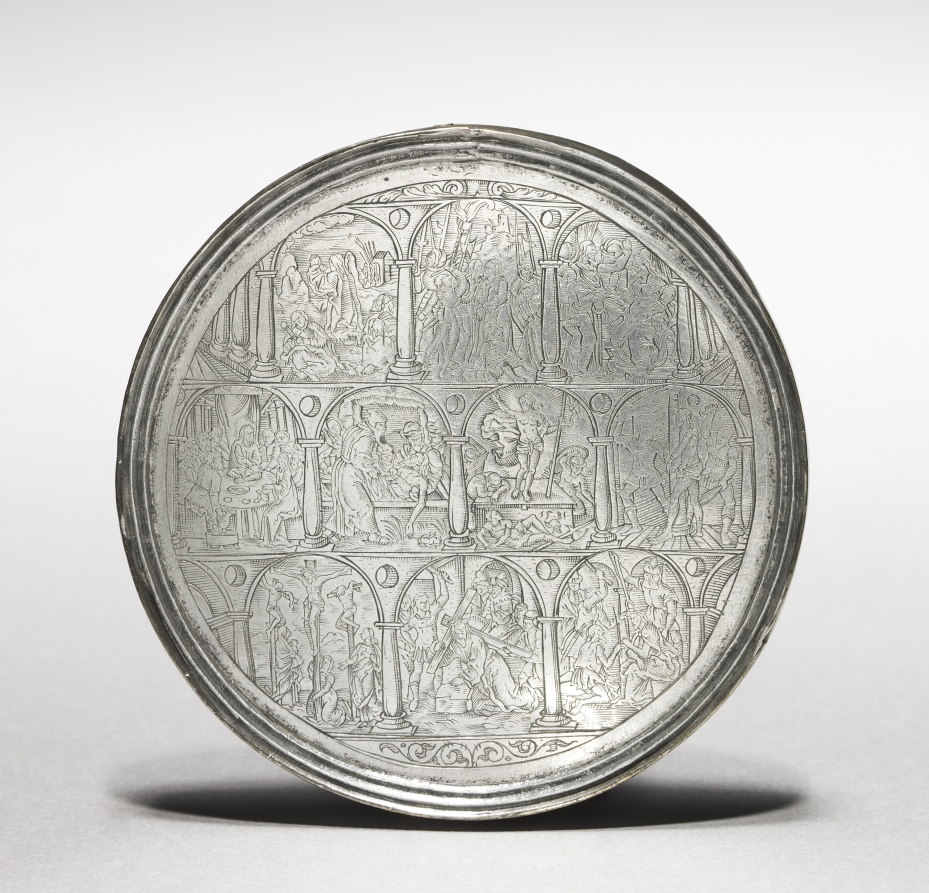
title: Lion Hunt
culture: Netherlands or Germany, 16th century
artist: follower of Moderno (Italian, 1467–1528)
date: 1581 or later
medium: silver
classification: Sculpture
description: The front of this medal contains an animated lion hunt; a nude male defends himself with his shield against an attacking lion while other nude horsemen and soldiers join in the fray. Contrasted against this high relief and classical motif, the reverse has an engraving of ten scenes from the Passion of Christ organized within cloister-like architecture. Starting with the "Last Supper" (on the far left in the center row), the story moves clockwise, ending in the two central scenes that depict Christ's deposition in the tomb and then his miraculous resurrection. The date 1581 is engraved on the altar in the scene of the resurrected Christ. The same Passion composition was also used for the reverse of a 1564 medal for the King of Poland, Sigismund Augustus (1520-1572). The tooling of the relief and the format of the Passion scenes correspond to prototypes and workmanship that suggest the medal was made by a Northern follower of Moderno.